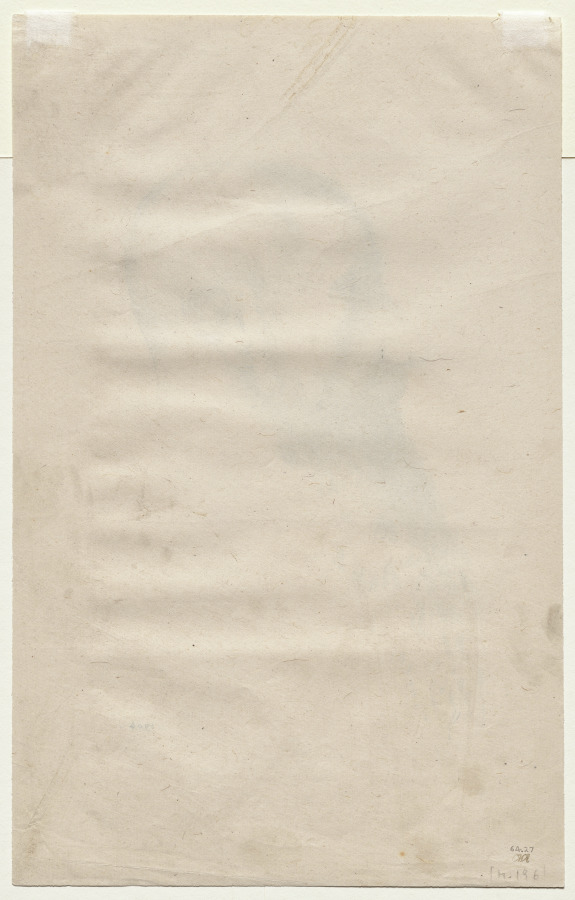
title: Roger Marx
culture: France, early 20th Century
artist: Odilon Redon (French, 1840–1916)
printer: Auguste Clot (French, 1858–1936)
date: 1904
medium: lithograph on China paper laid on wove paper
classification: Print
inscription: Inscribed in stone at lower right below image: 1904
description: Later in life, Odilon Redon turned to portraiture, creating likenesses of both commissioned sitters and his close friends. This print represents a figure central to his artistic and social milieu: Roger Marx was an influential critic who championed Redon’s work. Redon depicted only the head and profile of his subject, sketching Marx with fine and delicate detail. He produced just a small number of impressions of the lithograph, accentuating its personal and intimate theme.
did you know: Roger Marx (1859–1913), was an influential collector in addition to his work as an art critic.